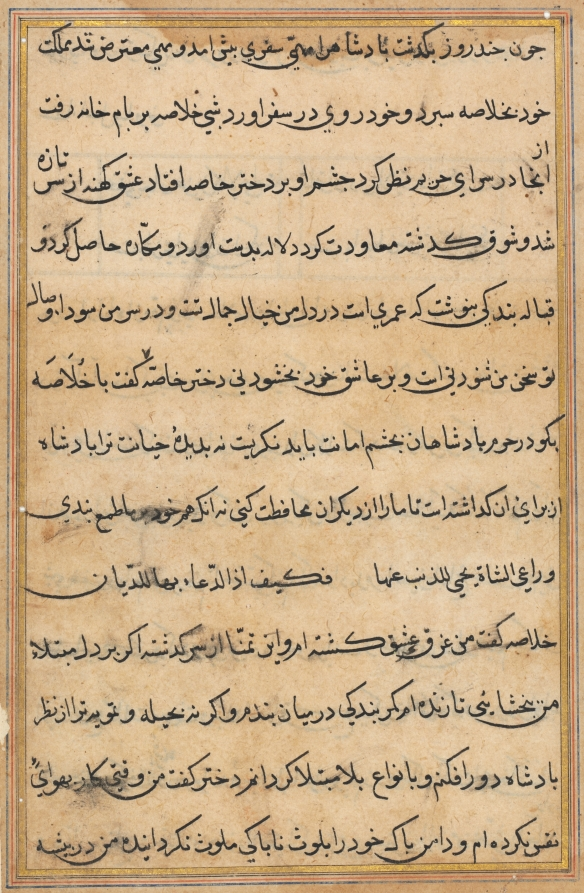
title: Page from Tales of a Parrot (Tuti-nama): text page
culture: Mughal India, court of Akbar (reigned 1556–1605)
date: c. 1560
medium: gum tempera, ink, and gold on paper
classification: Painting